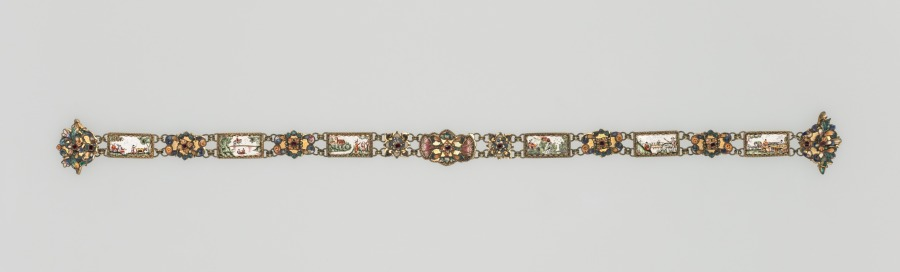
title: Belt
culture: Netherlands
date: early 1700s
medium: enamel on copper with gilt metal mounts and cloisonné medallions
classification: Enamel